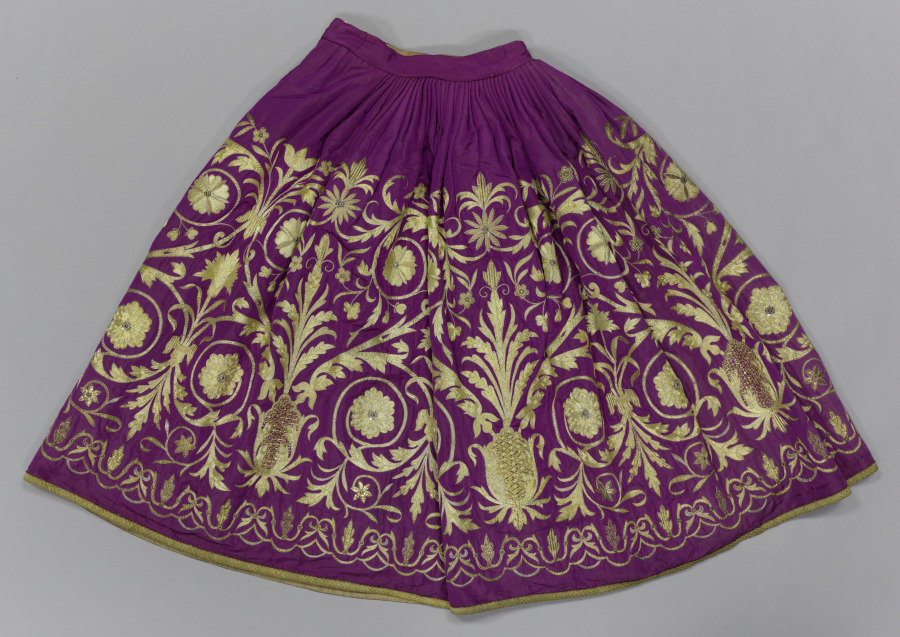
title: Woman's Costume (Skirt)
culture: Italy, Sicily, 19th century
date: 1800s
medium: plain weave silk (purple) with metal thread embroidery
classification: Garment